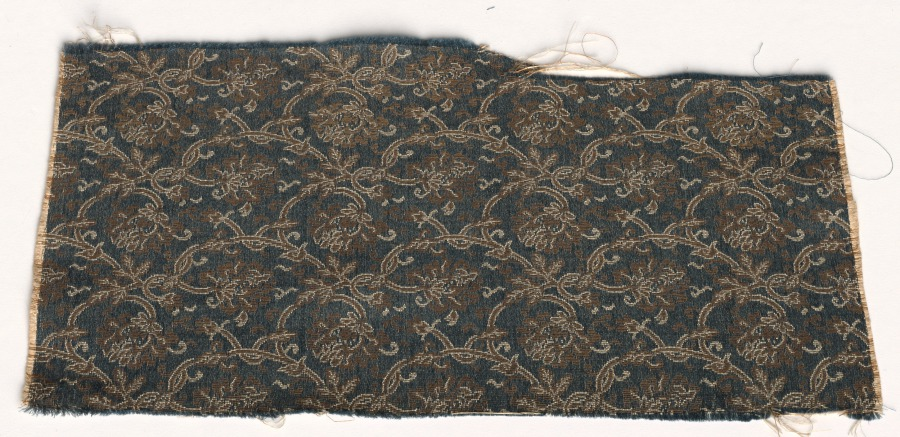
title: Textile Fragment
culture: Japan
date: 1800s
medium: silk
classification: Textile